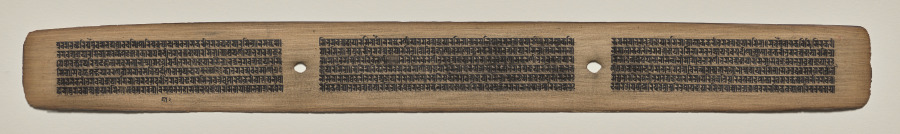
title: Text, Folio 61 (recto), from a Manuscript of the Perfection of Wisdom in Eight Thousand Lines (Ashtasahasrika Prajnaparamita-sutra)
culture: Eastern India, Bihar, Vikramashila Monastery. Painting: Nepal, Kathmandu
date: Sunday, September 14, 1119 (year 239 of the Newar Samvat in the month of Ashvina)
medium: gum tempera and ink on palm leaves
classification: Painting